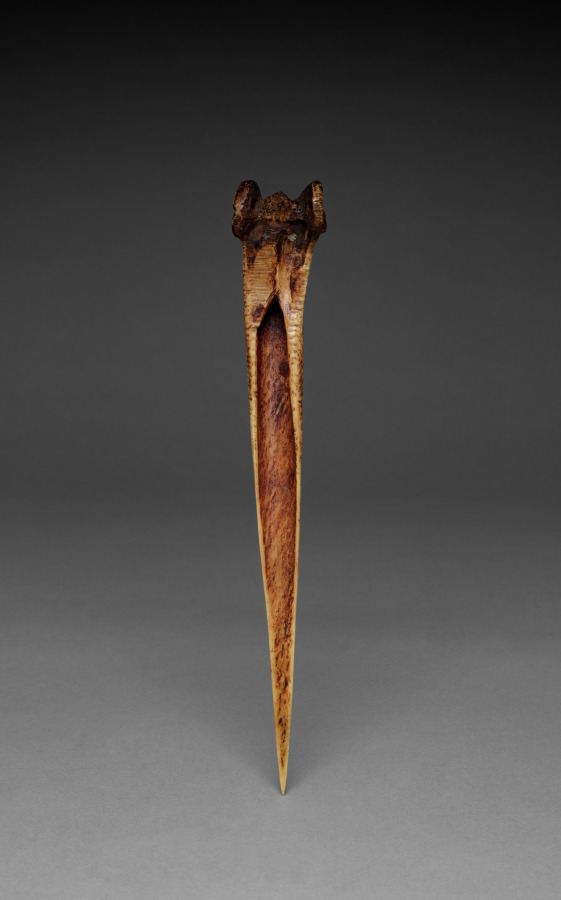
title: Dagger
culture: New Guinea, Sepik River Region, 20th century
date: 1900s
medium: cassowary bone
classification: Arms and Armor